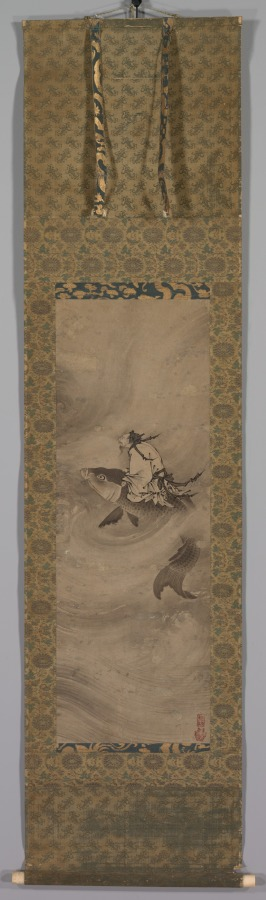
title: Immortal Riding on a Carp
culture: Japan, Edo period (1615–1868)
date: c. 1600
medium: hanging scroll; ink on paper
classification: Painting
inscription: seal of Motonobu ?